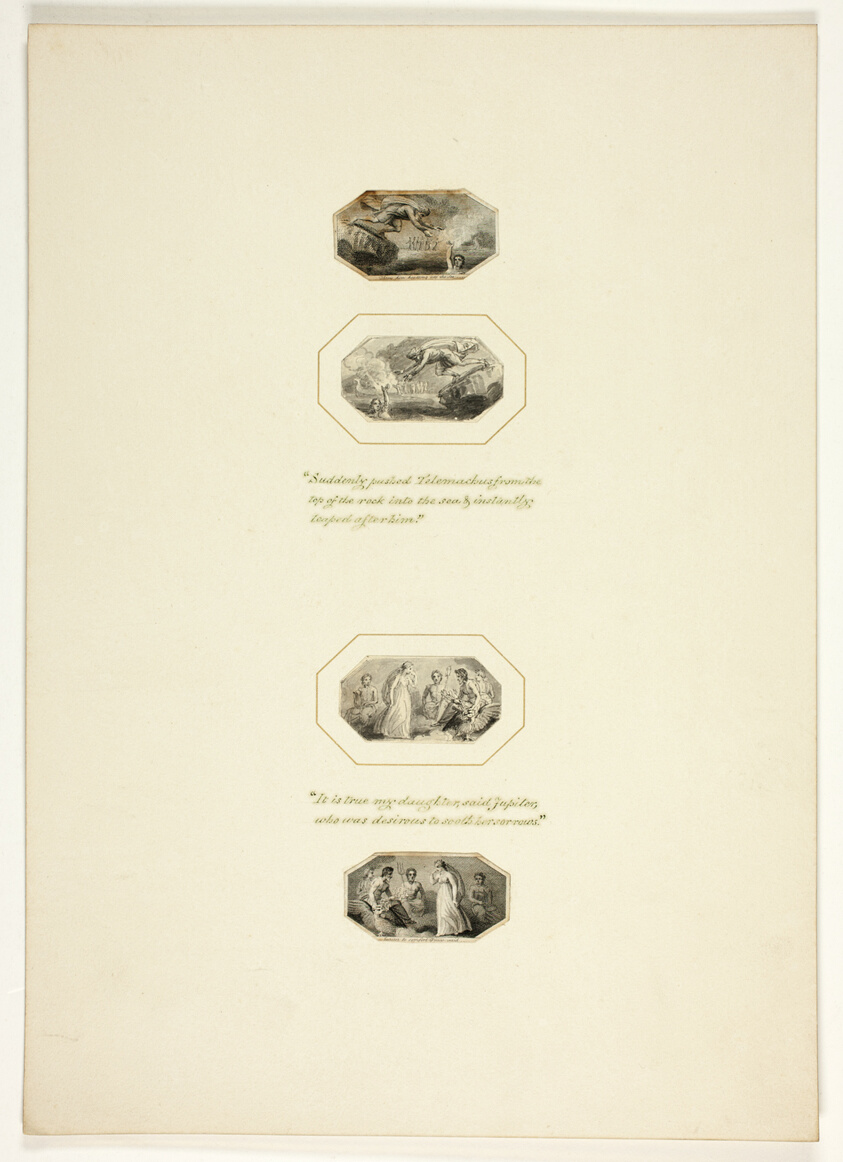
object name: Drawing and Watercolor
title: Study for a plate from Telemachus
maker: Thomas Stothard (English, 1755-1834)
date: c. 1797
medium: Ink wash on paper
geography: England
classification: ink or chalk wash; drawings (visual works); prints and drawing